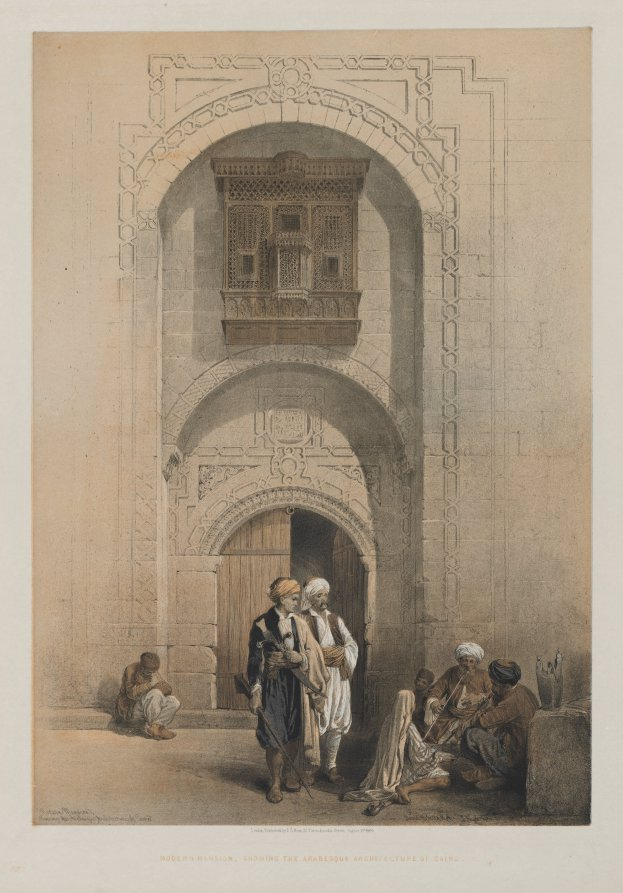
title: Egypt and Nubia, Volume III: Modern Mansion, showing the Arabesque Architecture of Cairo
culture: England, 19th century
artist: Louis Haghe (British, 1806–1885)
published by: F. G. Moon, 20 Threadneedle Street, London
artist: after David Roberts (Scottish, 1796–1864)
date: 1849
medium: color lithograph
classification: Print